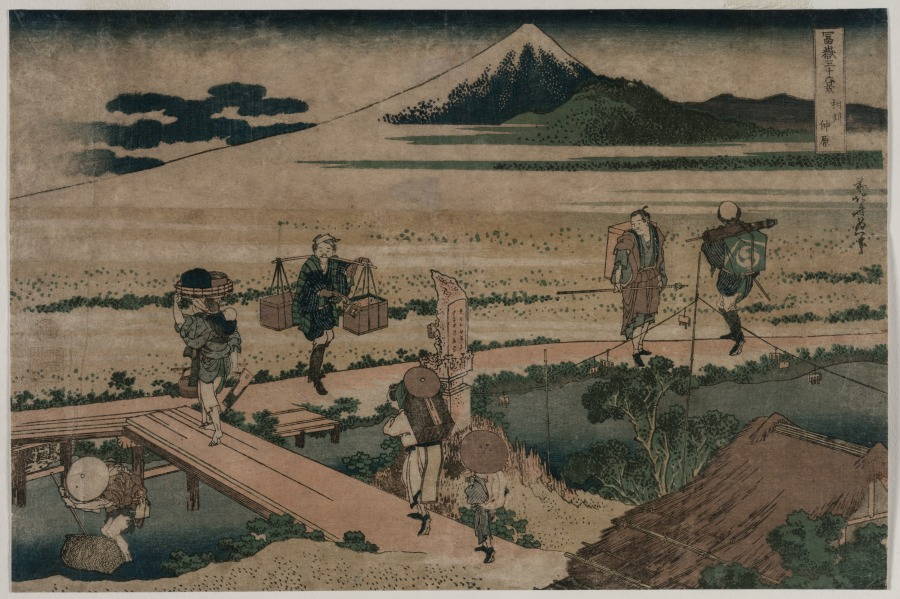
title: A View of Mount Fuji and Travellers by a Bridge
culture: Japan, Edo period (1615–1868)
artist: Katsushika Hokusai (Japanese, 1760–1849)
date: ca. 1835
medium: color woodblock print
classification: Print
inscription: Signature: Zen Hokusai I-itsu fude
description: Here, Mount Fuji is seen across the fields known as Nakahara, just off the T kaid Road (the principal route along the eastern coast between Edo and Kyoto). In the foreground is the thatched roof of a shrine and a stone statue on the bank of the stream.